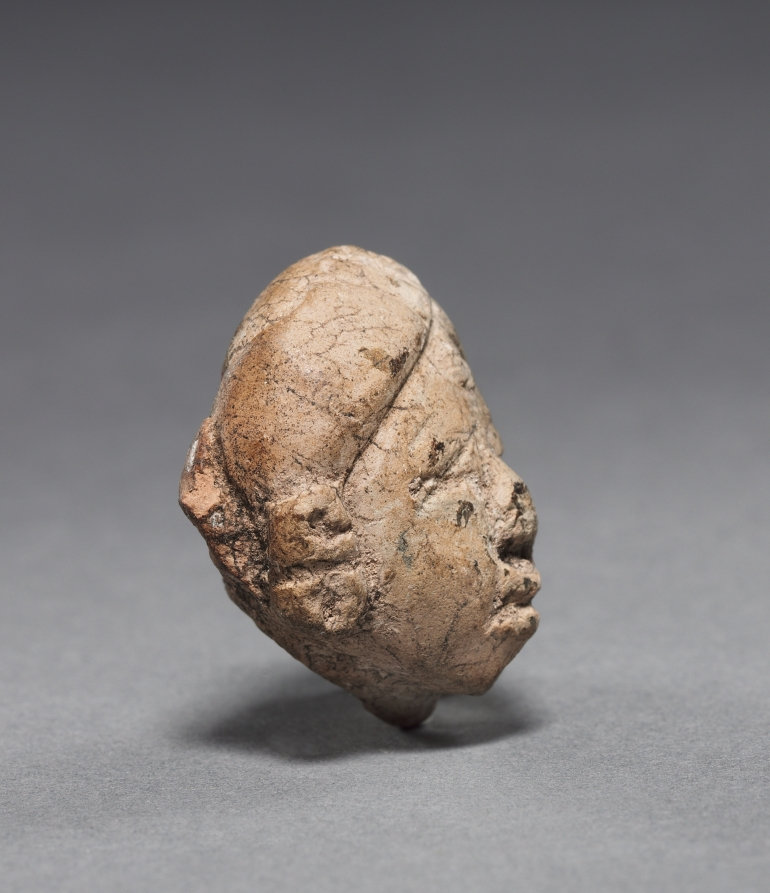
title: Figurine Head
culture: Mexico or Central America, Maya(?), Middle Preclassic period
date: c. 600–200 BCE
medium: pottery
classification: Sculpture